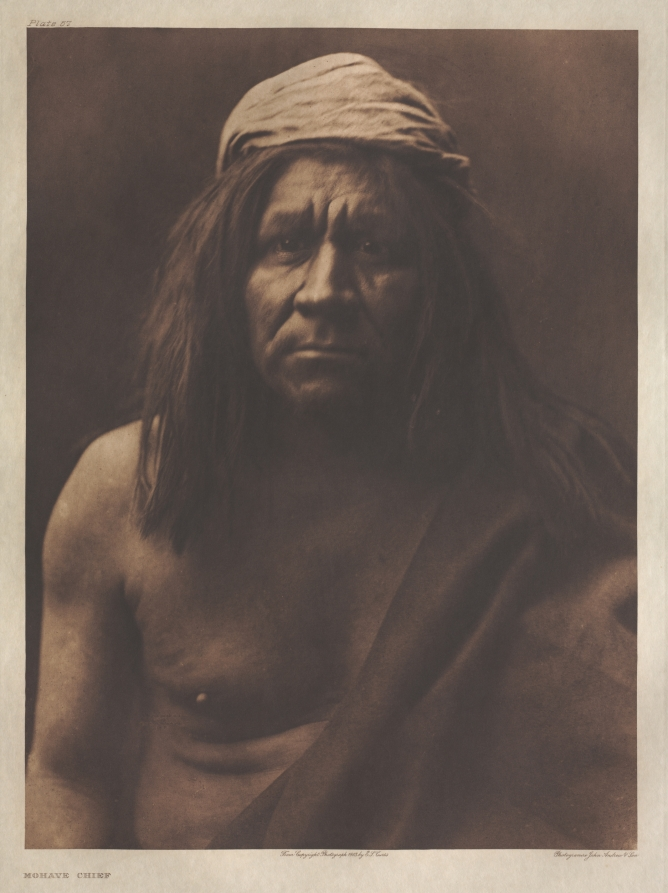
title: Portfolio II, Plate 57 / Mohave Chief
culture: America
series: The North American Indian: being a series of Portfolios picturing and describing the Indians of the United States, the Dominion of Canada, and Alaska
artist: Edward S. Curtis (American, 1868–1952)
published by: The University Press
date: 1903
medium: photogravure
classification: Portfolio